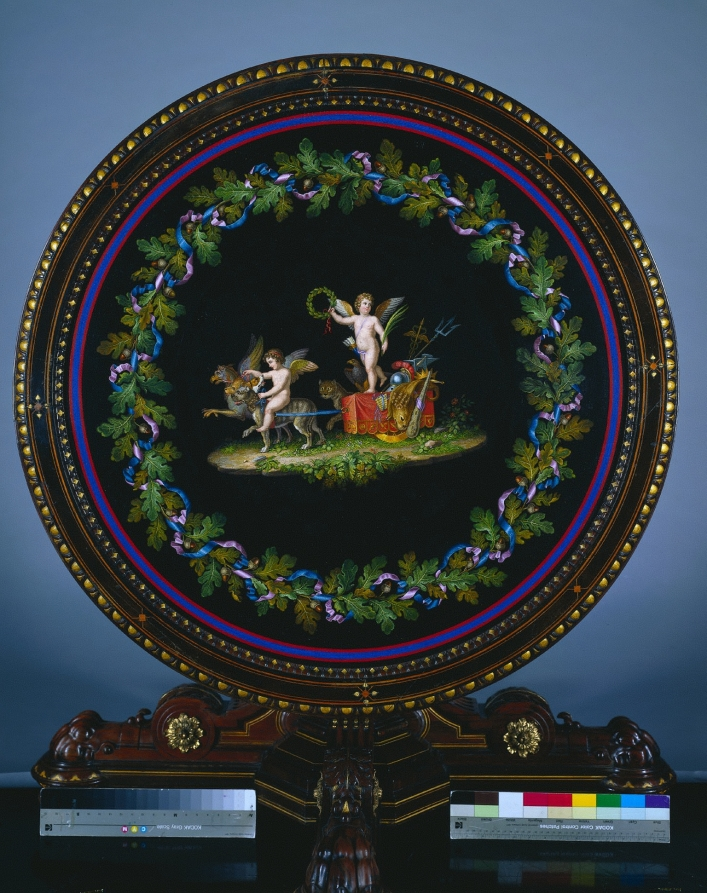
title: Center Table with Micromosaic Top, "Love Triumphant"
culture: Italy, Rome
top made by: Agostino Francesangeli (Italian)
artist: attributed to Herter Brothers (American)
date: table c. 1865; top c.1830–50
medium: walnut with gilding and gilt-metal mounts, inlaid ornament, and mosaic top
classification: Furniture and woodwork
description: This table once graced the home of William J. Gordon (1818-1892), probably best known for the bequest of the site of his residence to the city of Cleveland, to create Gordon Park. He is known to have visited Europe in 1865 and it is reported that the top of this table was purchased in Rome from Agostino Francesangeli. Its pictorial design, executed in micromosaic (a mosaic made from tiny glass tesserae, or tiles), is based on a decoration at the Villa Lante thought to have been painted by the great Italian Renaissance artist, Raphael (1483-1520). After he returned home, Gordon probably commissioned the wooden table itself to be made by the New York firm of Herter Brothers.